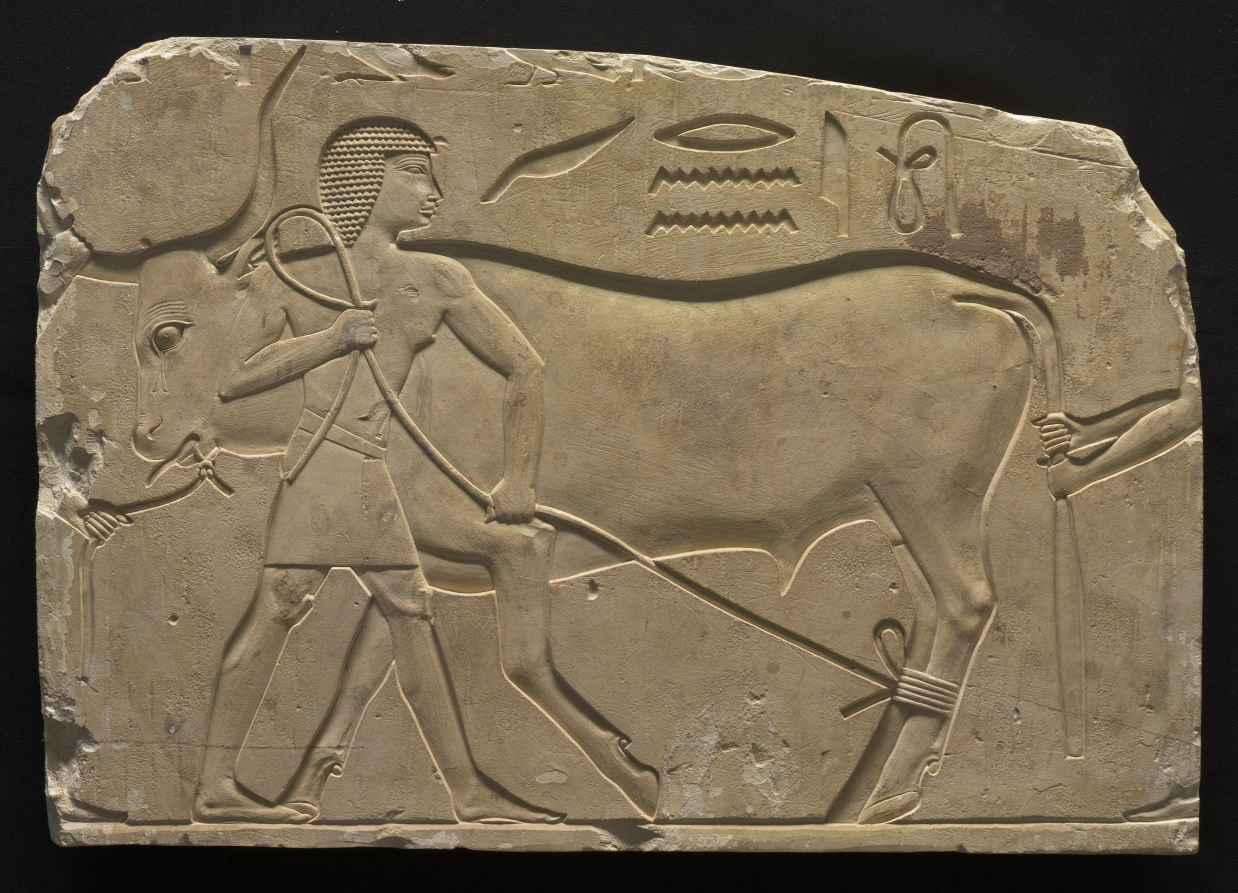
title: Men Trussing an Ox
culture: Egypt, Late period (715–332 BCE), Dynasties 25–26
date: c. 667–647 BCE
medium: limestone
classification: Sculpture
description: Several attendants are trussing an ox in preparation for its ritual slaughter, either as a food offering to the deceased or as part of the funerary feast. It is probably a direct copy of an Old Kingdom relief.